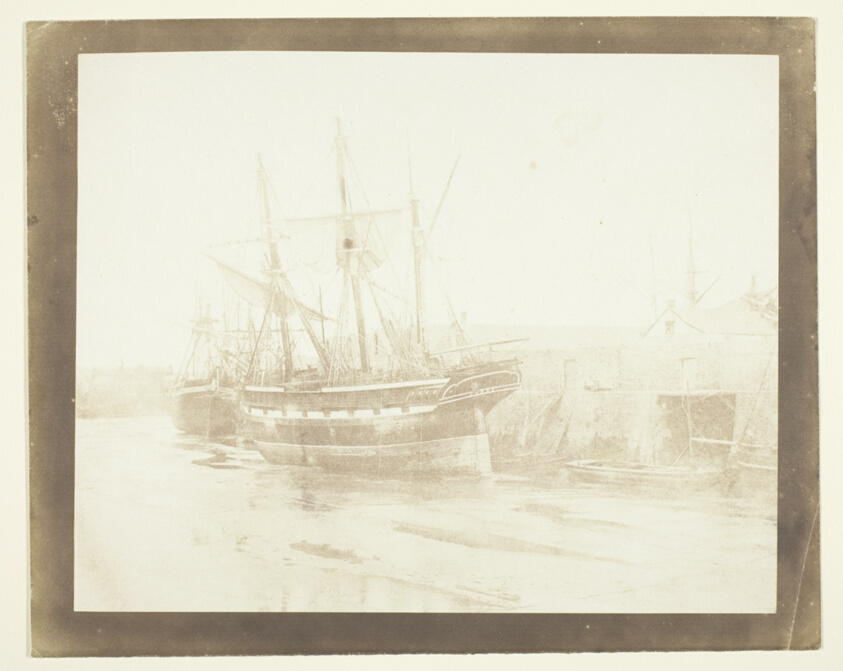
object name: Photograph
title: 143. Copper Ore Vessel, Swansea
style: 19th century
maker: Rev. Calvert R. Jones (Welsh, 1804–1877)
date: 1846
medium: Salted paper print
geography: England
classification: salted paper print; photographic process; photography; photograph